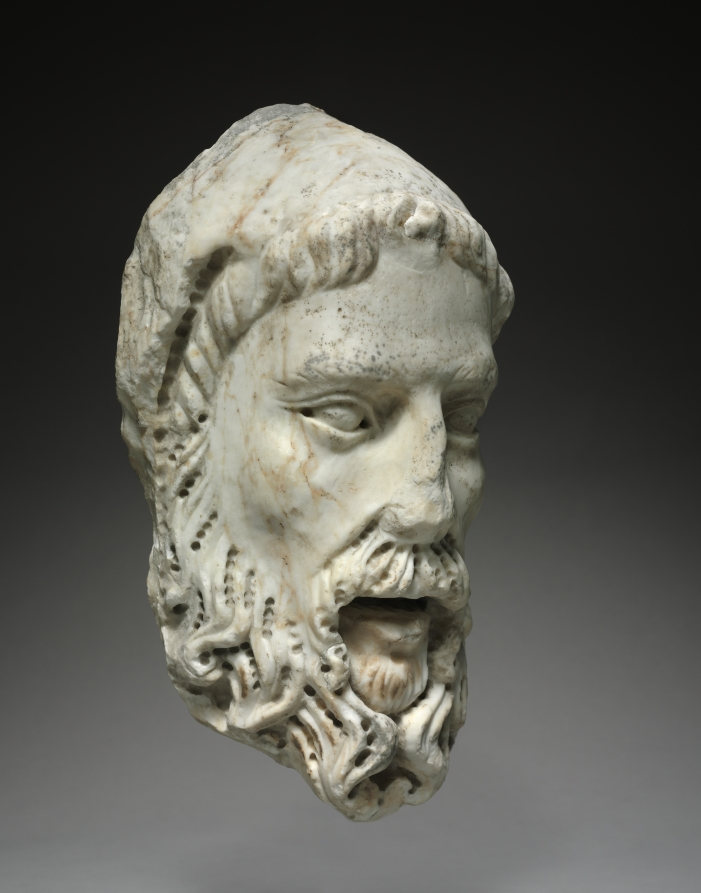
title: Head of a Prophet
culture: Italy, Siena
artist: workshop of Giovanni Pisano (Italian, c. 1240-c. 1320)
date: c. 1300–1325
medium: marble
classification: Sculpture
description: This head exhibits many of the characteristics of the style associated with the workshop of Giovanni Pisano. These are particularly noteworthy in the sensitive carving of the haunting face and its strikingly drilled beard. The head compares favorably to the sculpture made while Giovanni was master of works at Siena Cathedral (1285-97). Recent research suggests that it may once have belonged to a full-length Old Testament prophet looming on the exterior of Siena Cathedral.